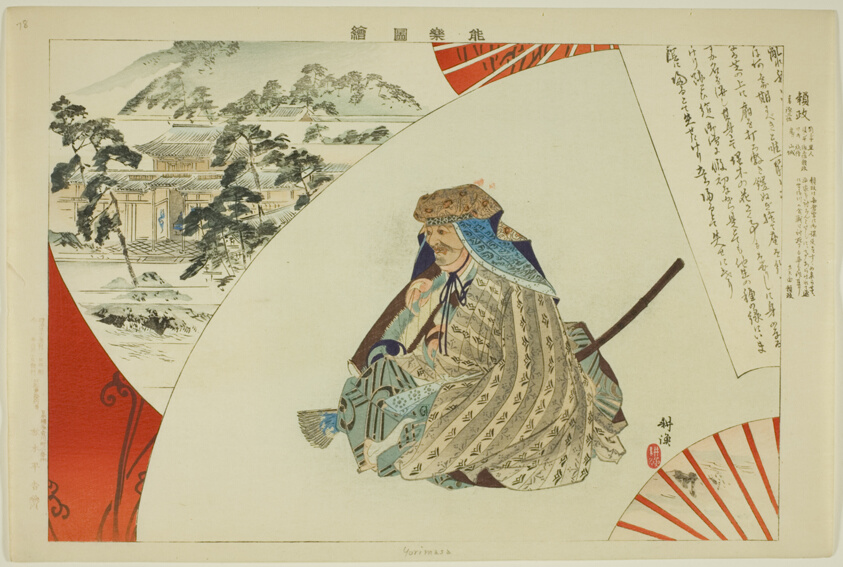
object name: Print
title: Yurimasa, from the series "Pictures of No Performances (Nogaku Zue)"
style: Japanese (culture or style)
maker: Tsukioka Kogyo; Japanese, 1869-1927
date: 1898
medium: Color woodblock print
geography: Japan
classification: woodblock print; print; asian art